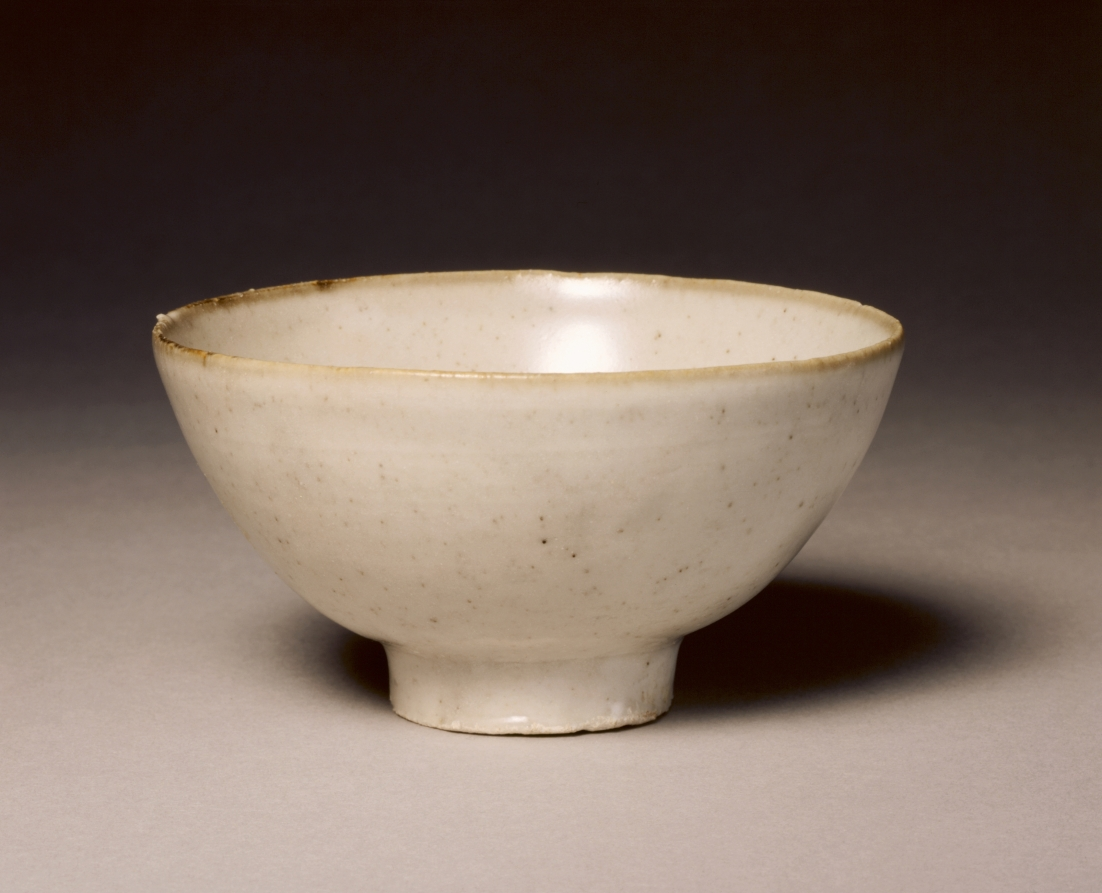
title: Bowl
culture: China, Qing dynasty (1644-1911)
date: c. 1690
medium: porcelain with gray glaze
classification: Ceramic